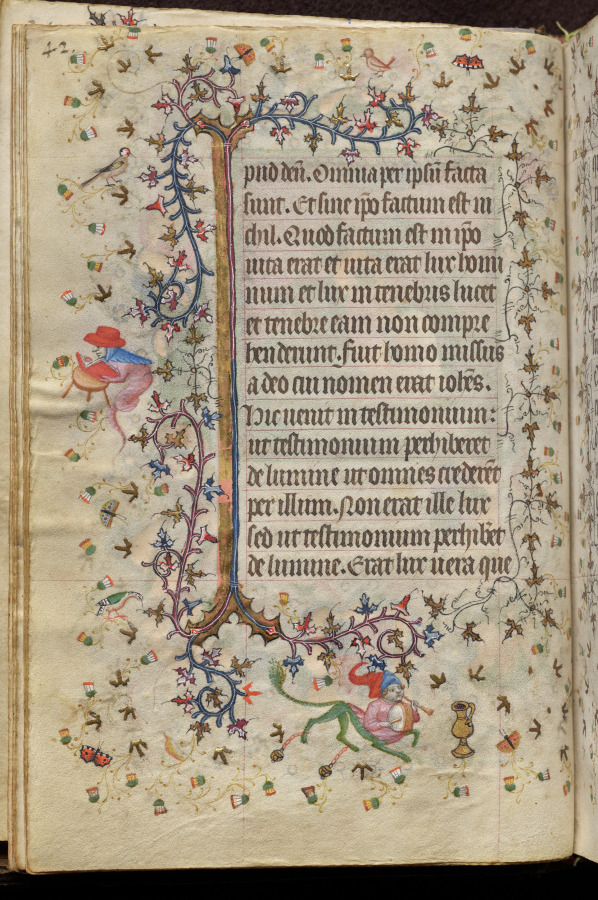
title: Hours of Charles the Noble, King of Navarre (1361-1425): fol. 21v, Text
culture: France, Paris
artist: Master of the Brussels Initials and Associates (French)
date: c. 1405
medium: ink, tempera, and gold on vellum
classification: Bound Volume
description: This precious volume was obviously highly prized by its owner, the French-born King of Navarre, who had his coat of arms painted on no less than twenty folios. Rather than directly commissioning this manuscript from a specific workshop, it seems that Charles the Noble acquired his book of hours -- perhaps ready-made for the luxury market -- while on a trip to Paris in 1404-05. A collaborative effort, six painting styles are evidenced within the pages of this codex, those of two Italians, two Frenchmen, and two Netherlanders. The painter who was responsible for the planning and decoration of the book, and who produced seventeen of the large miniatures, was a Bolognese artist known as the Master of the Brussels Initials. His principal assistant, responsible for most of the borders, was a Florentine who signed his name "Zecho" da Firenze on folio 208 verso.